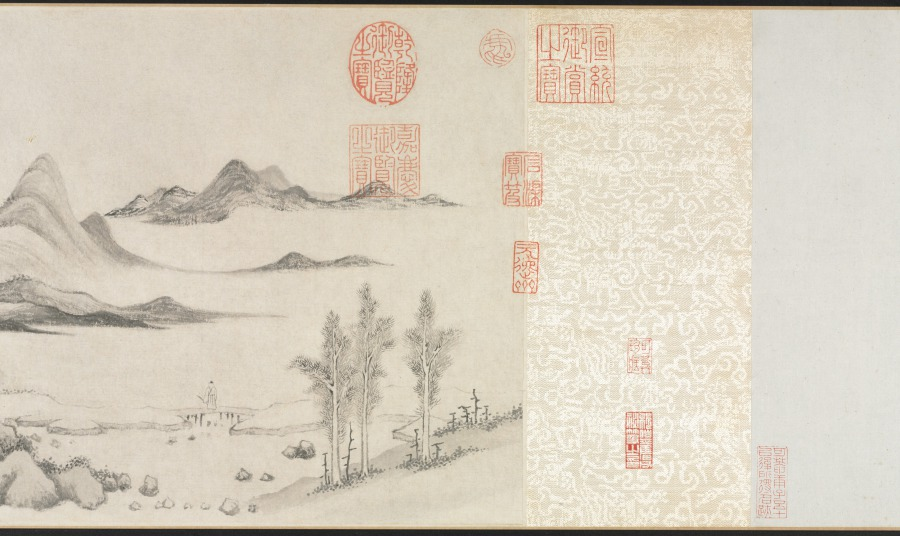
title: Water Village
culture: China, Ming dynasty (1368–1644)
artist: Wen Boren (Chinese, 1502–1575)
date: 1570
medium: handscroll; ink and light color on paper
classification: Painting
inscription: 隆慶庚午秋仿趙文敏筆. 五峰文伯仁 [印] 五峰山人; 文伯仁印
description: In the autumn of 1570, Wen Boren painted this seemingly unemotional scene of low-lying marshlands with a chain of rounded mountains in the background. A fishing boat is nestled on the shore near the village. Although paths and bridges traverse the landscape, only two people are visible in the stillness. From the restrained atmosphere of this landscape, one would never guess that Wen Boren was known as the “bad boy” of the Wu School for his explosive temper. As a younger man, he was even embroiled in a contentious lawsuit with his own uncle, Wen Zhengming (1470–1559), a master of Ming dynasty painting with whom he had trained. The ideal of the scholar-painter, or literati, was that an artist’s moral character is reflected in his paintings, so there was great incongruity between Wen Boren’s difficult personality and his restrained landscapes. A contemporary, Wang Shizhen, wrote this about him: "This gentleman is prone to behave odiously and screamed accusations at people. How is it possible for him to carry in his bosom such a wealth of scenic wonders?" Who knows what effort it took to subdue his fractious spirit to project an image of coolness and refined taste in his paintings?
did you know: A foreground tree has an eccentric twisting silhouette and pepper-dot "halo" of leaves.